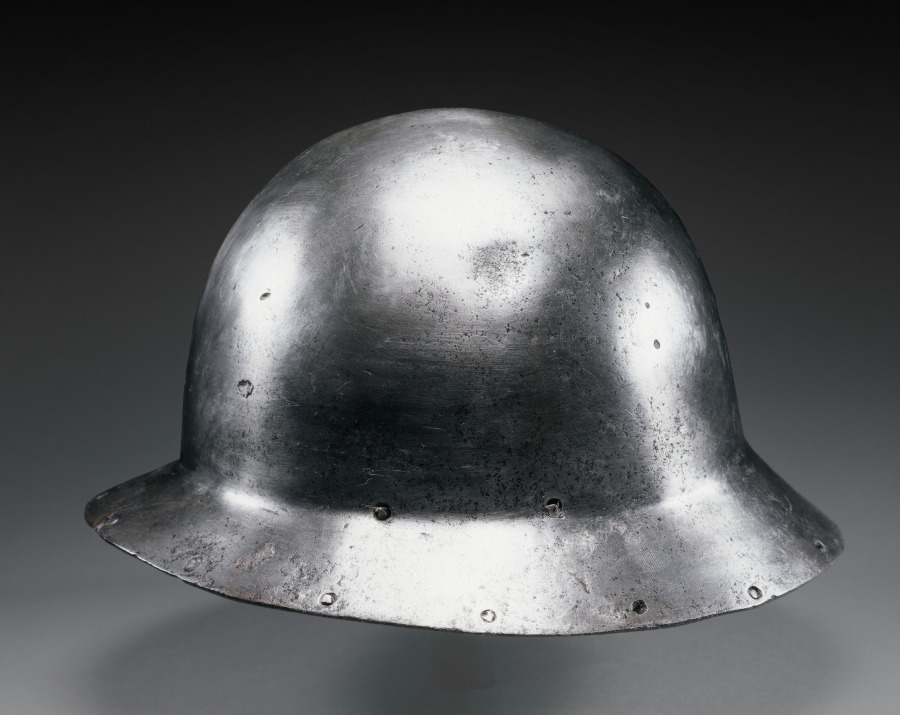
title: Kettle Hat (War Hat)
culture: Italy, 15th century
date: c. 1460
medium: steel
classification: Arms and Armor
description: Open helmets like this one were used by medieval infantries. The helmet weighs 12-1/2 pounds. This unusual weight was required for siege purposes—such helmets were worn by the men who attempted to scale the walls of an armed town. The rivet holes along the ridge were for the attachment of the liner.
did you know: Modern soldiers wear Kevlar combat helmets that weigh four to five pounds. By comparison, this medieval helmet is nearly three times as heavy. Imagine what it would have been like to wear such a heavy piece of equipment on your head during a siege.